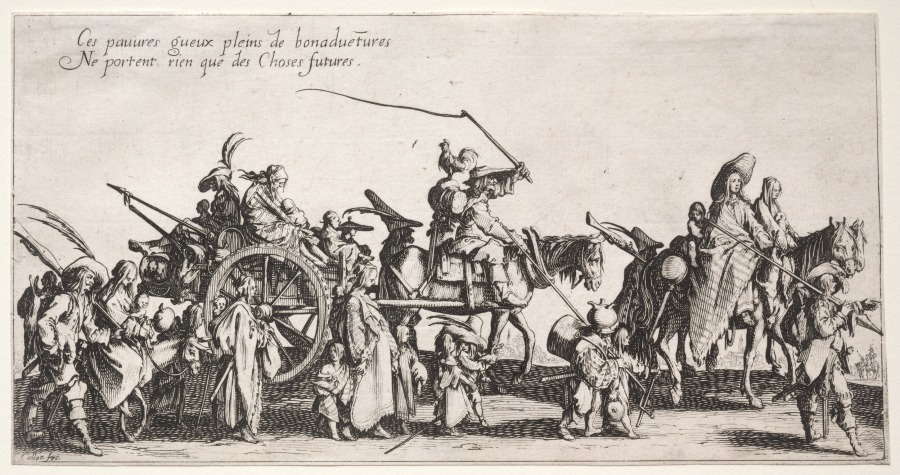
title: The Bohemians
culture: France, 17th century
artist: Jacques Callot (French, 1592–1635)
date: c. 1621–25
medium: etching and engraving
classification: Print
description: Jacques Callot, a masterful draftsman, spent the greater part of his life at the ducal courts of Tuscany and Lorraine, where he produced prints to record festivals and theatrical performances. He also executed religious subjects and scenes reflecting many aspects of daily life including war, pervasive in 17th-century Europe. When returning to France from Italy, Callot probably saw bands of rootless men, women, and children-a common sight-which became the subject of The Bohemians. He conceived of these four prints as a long frieze; the lines in each of the sheets extend into the sheet that follows. The first two scenes depict a procession of scrawny horses and disheveled families in tattered, exotic clothing. The last two show these vagrants pillaging a farm and then enjoying a feast. The inscriptions, from left to right, comment on the action: The only things these poor fortune-telling beggars carry with them are things yet to come. Are these not fine messengers, straying through foreign lands? You who take pleasure in their words, watch out for your blancs, testons and pitolles (coins). When all is said and done, they find that their fate is to have come from Egypt to this feast.